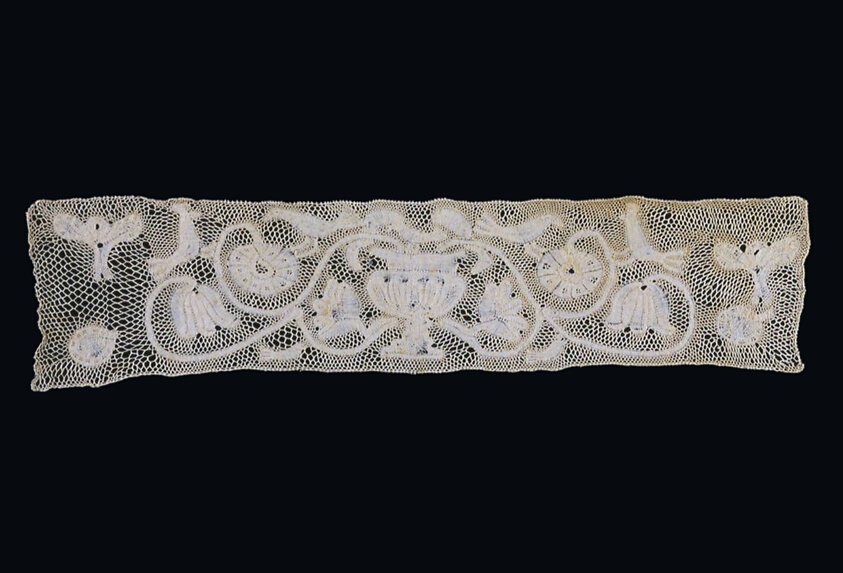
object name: Textile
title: Insertion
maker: Probably Hungary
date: 1725/1775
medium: Linen, bobbin part lace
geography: Hungary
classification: textile; lace - bobbin; lace